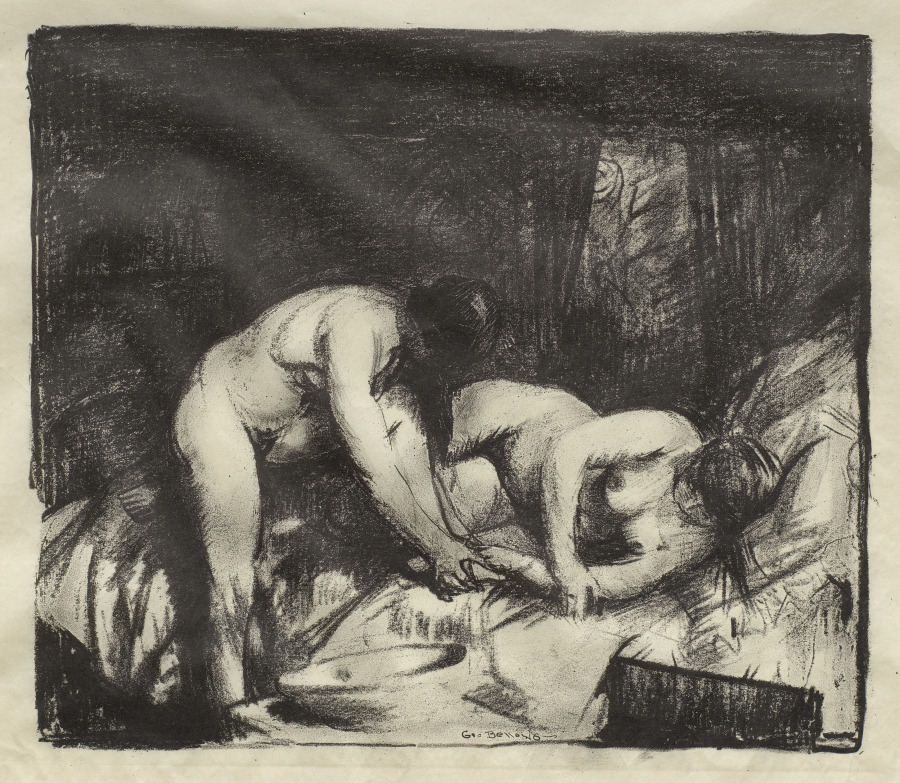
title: Two Girls, first state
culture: America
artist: George Bellows (American, 1882–1925)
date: 1917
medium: lithograph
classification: Print